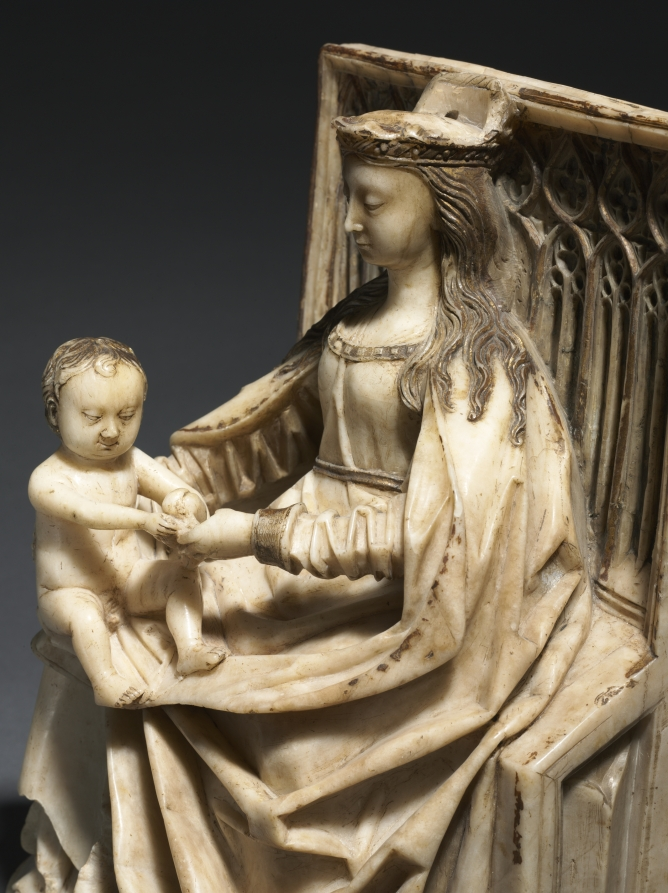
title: Enthroned Virgin and Child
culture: Spain, Burgos, 15th century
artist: Gil de Siloé (Spanish, active c. 1475–1505)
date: c. 1480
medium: alabaster with traces of gilding and polychromy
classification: Sculpture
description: The seated Virgin Mary with Christ is one of the most popular themes in Christian art of the Middle Ages. Alabaster was an ideal material to depict the fleshiness of Jesus, the lush folds of Mary’s cloak, and the fine details of the throne and gown. Christ is reaching for something in his mother’s hand that is now unrecognizable because alabaster tends to break or wear away quickly. It may have been a book or a piece of fruit. Given its small size, it is likely that this sculpture was intended for private use.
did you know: This sculpture was possibly made for Queen Isabella, the Spanish ruler who sponsored Christopher Columbus.